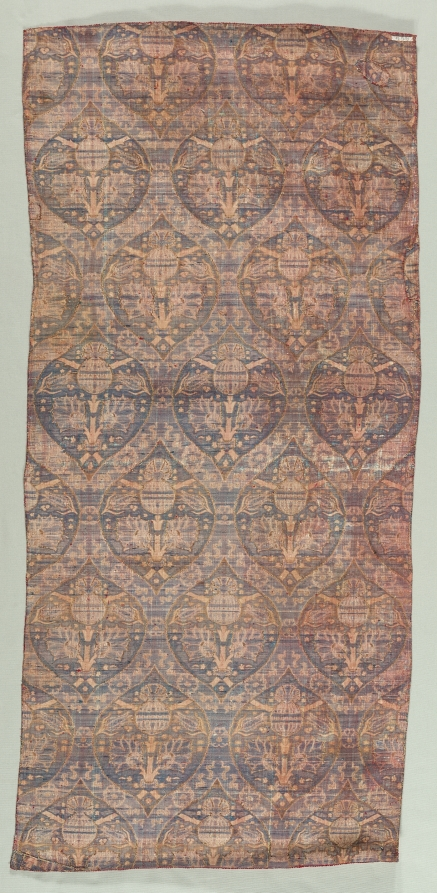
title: Ogival Lattice with Horizontal Design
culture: Turkey, Bursa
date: 1600–1650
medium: Silk and gilt-metal thread: lampas weave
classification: Textile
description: There is a pomegranate design in each ogee (pointed arch) of this silk brocade fragment. The pomegranate is a small tree originating in Persia (today’s Iran) bearing fruit of deep red flesh filled with hundreds of seeds. The pomegranate has been revered as a symbol for health and fertility by many civilizations. In Islam the pomegranate is associated with paradise as described in the Qur’an.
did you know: There is a pomegranate design in each ogee.